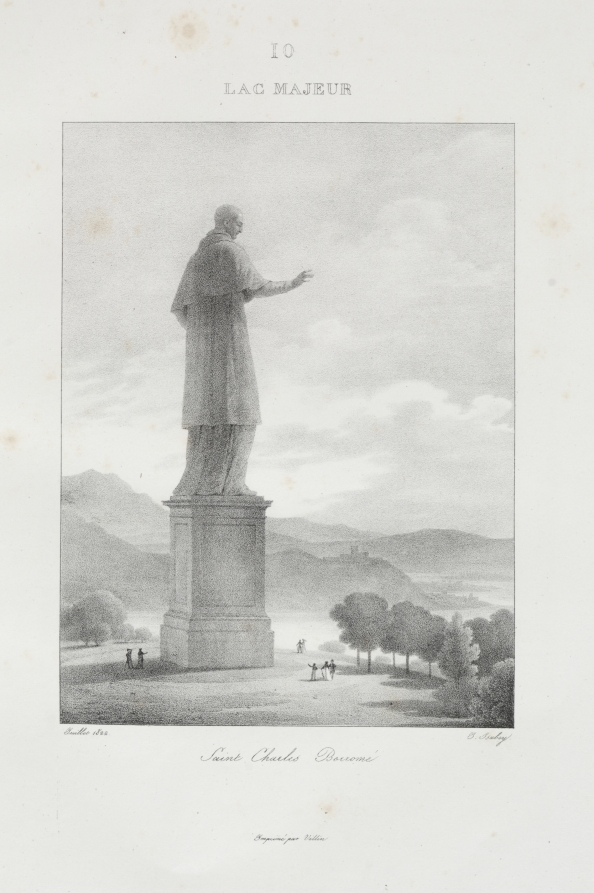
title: Voyage en Italie en 1822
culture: France, 19th century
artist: Jean-Baptiste Isabey (French, 1767–1855)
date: 1833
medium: lithograph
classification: Bound Volume